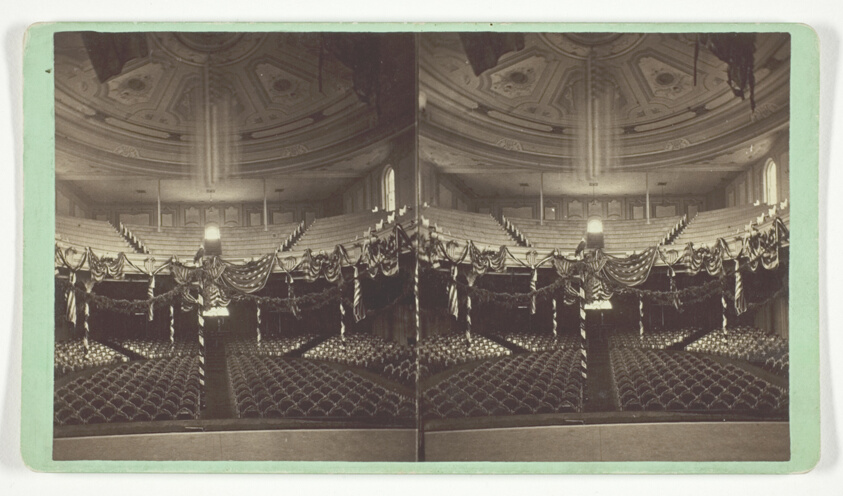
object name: Photograph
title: Untitled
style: 19th century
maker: Wright & Hartwell (Americans, active late 19th century)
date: Late 19th century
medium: Albumen print, stereo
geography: Lafayette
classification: photography; photograph; albumen silver print; stereograph (albumen)